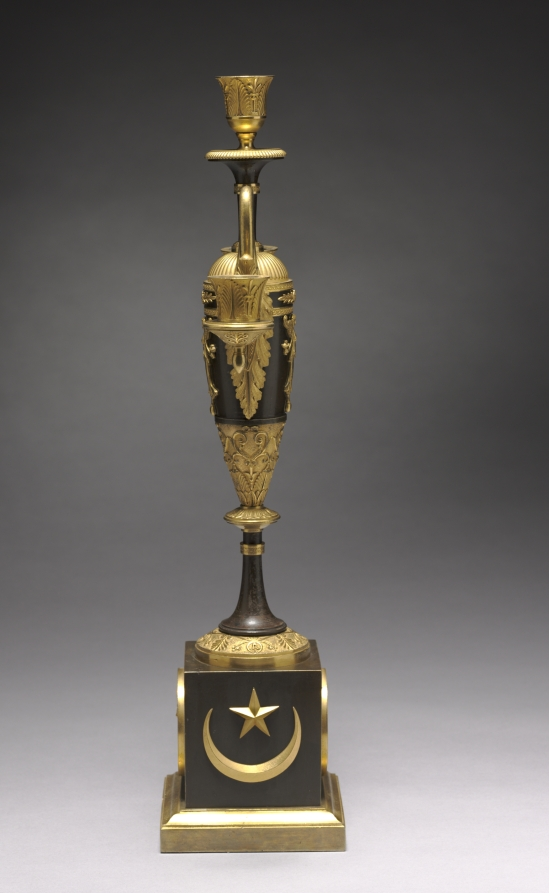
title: Candelabrum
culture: France, late 18th-early 19th century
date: c. 1800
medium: gilt and patinated metal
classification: Furniture and woodwork